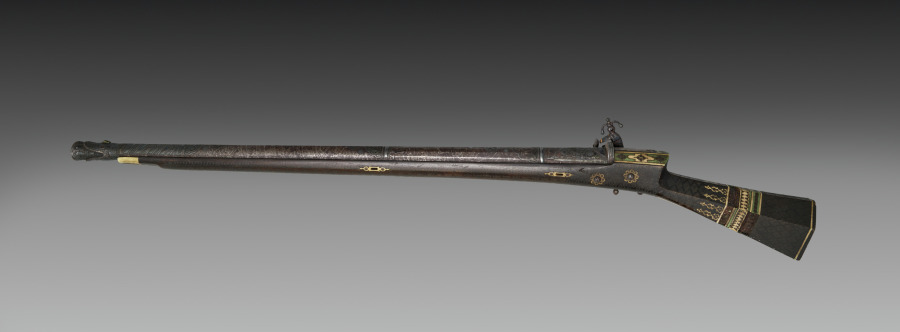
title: Gun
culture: India, Rajput Kypi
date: c. 1800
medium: iron with bone and silver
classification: Arms and Armor